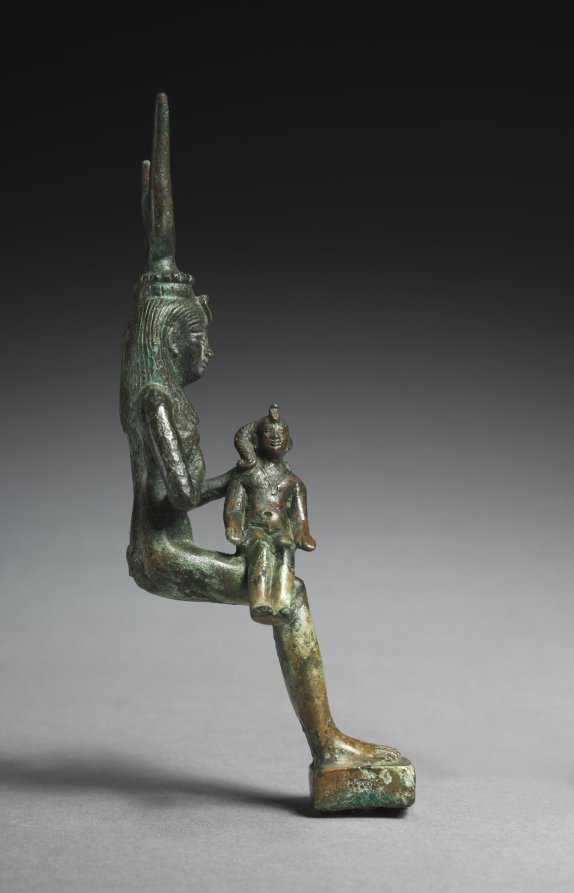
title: Statutette of Isis and Horus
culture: Egypt, Greco-Roman period (332 BCE–395 CE), Ptolemaic dynasty (305–30 BCE)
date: 305–30 BCE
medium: bronze, solid cast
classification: Sculpture